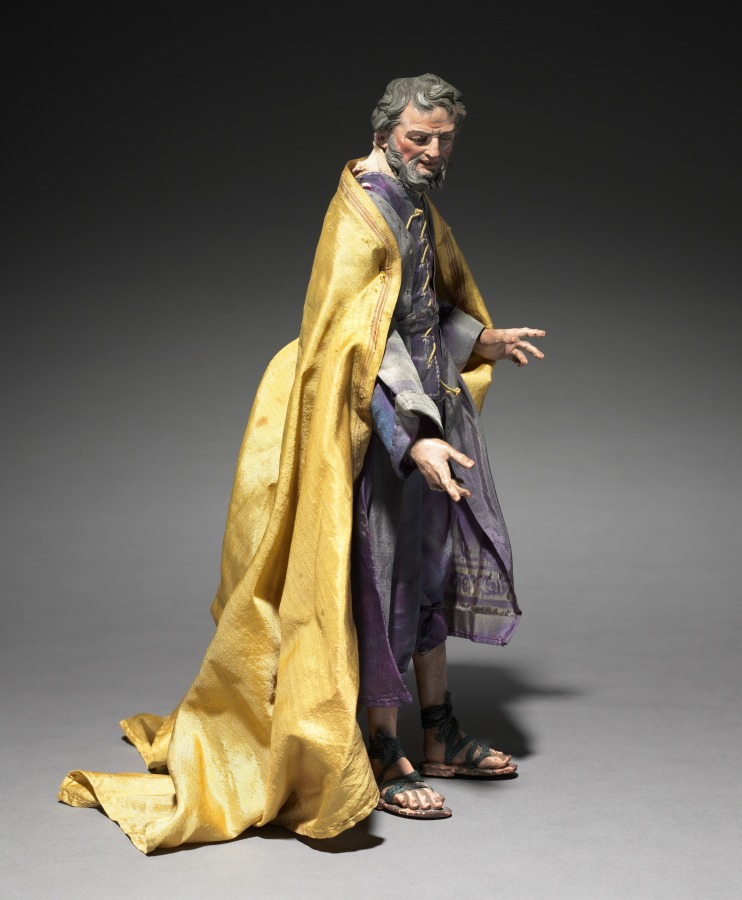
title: Figure from a Crèche: Joseph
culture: Italy, Naples, late 18th-early 19th century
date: 1780–1830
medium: painted wood and terracotta with various textiles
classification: Sculpture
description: The practice of creating scenes of the Nativity for the home dates from the early 1700s in Italy, where people began to set up doll-like figures of about a foot or less in height. The custom was particularly popular in Naples around 1800, where crèche scenes (crèche means cradle, or crib) included many figures, whose heads and hands of painted terracotta, stuffed cloth bodies, and clothing adapted from contemporary local costumes gave them an amazingly realistic character. Representations of the birth of Jesus can be traced to the first few centuries of Christianity. Both living creatures and sculptural depictions of them were used from early times. By the late middle ages it was customary to create life-size figures of wood or stone, naturalistically painted, to represent the characters who participated in the events of Jesus's early life. These sculptures were then arranged in scenes illustrating one or both of the most important of these events, the Adoration of the Shepherds and the Adoration of the Magi-the three kings from the East who came to pay homage to the Christ child. Used in churches, these large figures were especially popular in Italy, Central Europe, Spain, and Portugal.